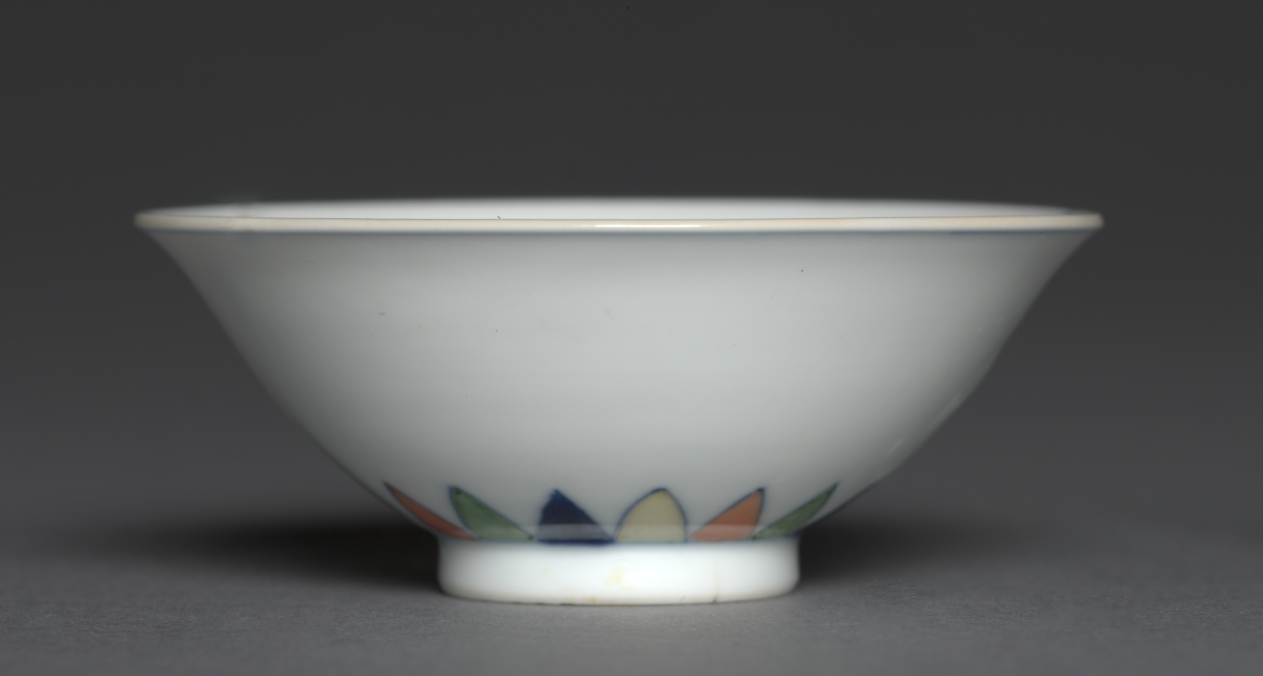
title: Bowl with Flying Cranes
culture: China, Jiangxi province, Jingdezhen kilns, Qing dynasty (1644-1911), Yongzheng mark and reign (1723-35)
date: 1723–35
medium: porcelain decorated in underglaze blue and overglaze enamels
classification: Ceramic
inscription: 大清雍正年制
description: The interior of this small bowl has peaches in the center bordered by stylized cloud forms alternating with cranes in flight. Both cranes and peaches symbolize longevity making this bowl doubly auspicious.